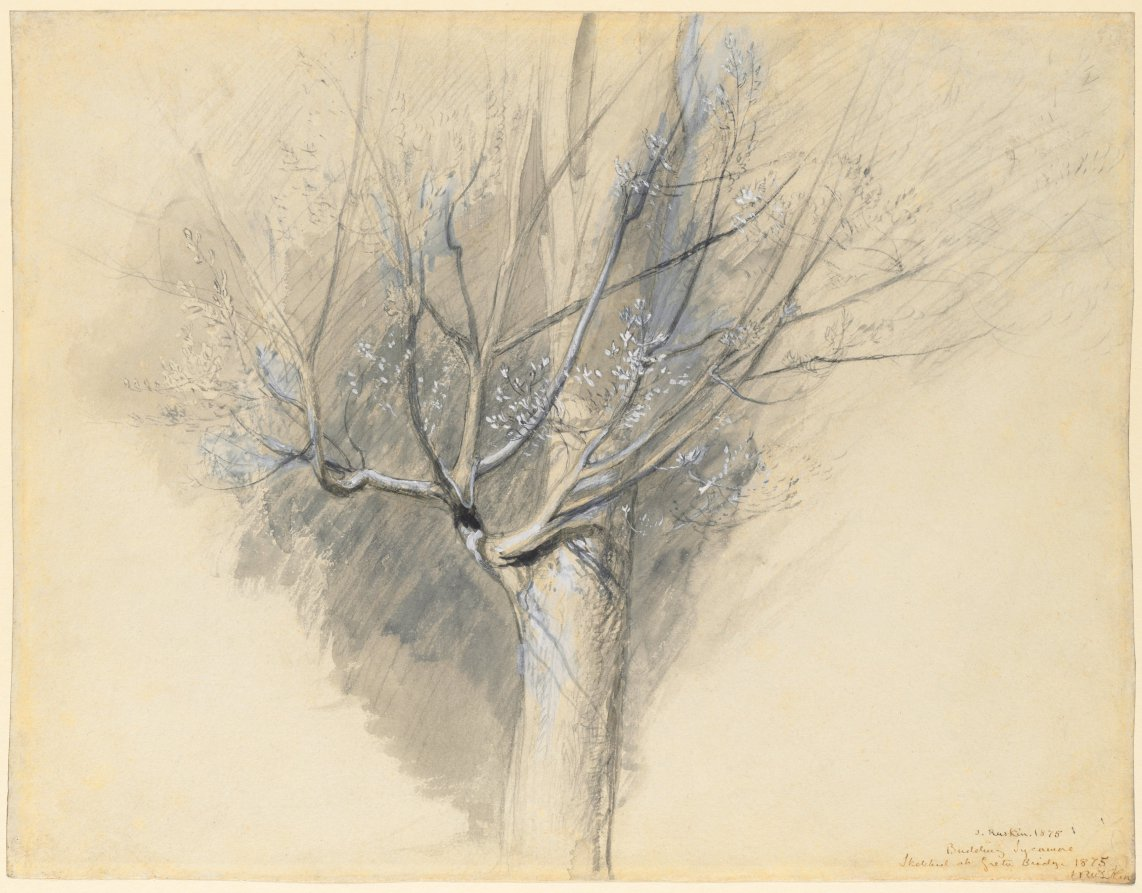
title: Budding Sycamore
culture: England, 19th century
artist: John Ruskin (British, 1819–1900)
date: c. 1876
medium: black and gray wash, gouache, and graphite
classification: Drawing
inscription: signed and inscribed, in brown ink, at lower right: 1875 / Budding Sycamore / Sketched at Greta Bridge / 1875 / J. Ruskin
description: The most influential art critic in Britain during the 19th century, John Ruskin was also an amateur artist for whom drawing was the cornerstone of artistic practice. Since his early youth, a keen perception of the world and obsessive desire to capture nature in all of its details found expression in his drawings. In this study of a leafing sycamore in early spring, Ruskin combined exquisite detail with atmospheric rendering of space, leaving the edges of the drawing unresolved. This sheet exemplifies his belief that drawn fragments, if sensitively observed, were capable of suggesting the profound mysteries of the natural world.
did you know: This drawing was used as an illustration in John Ruskin's manual on drawing, Rudimentary Studies.